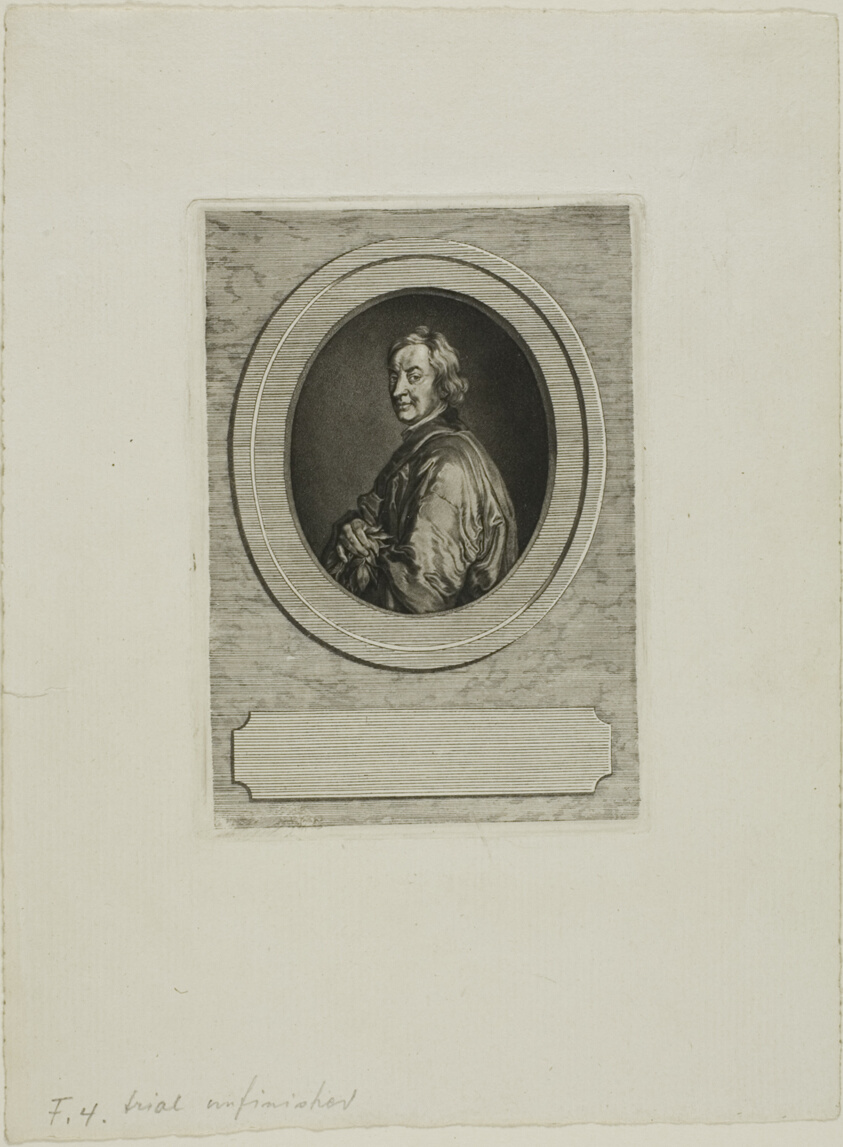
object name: Print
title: John Dryden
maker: Jean-Baptiste de Grateloup (French, 1735-1817)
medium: Aquatint on paper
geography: France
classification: aquatint; print; prints and drawing